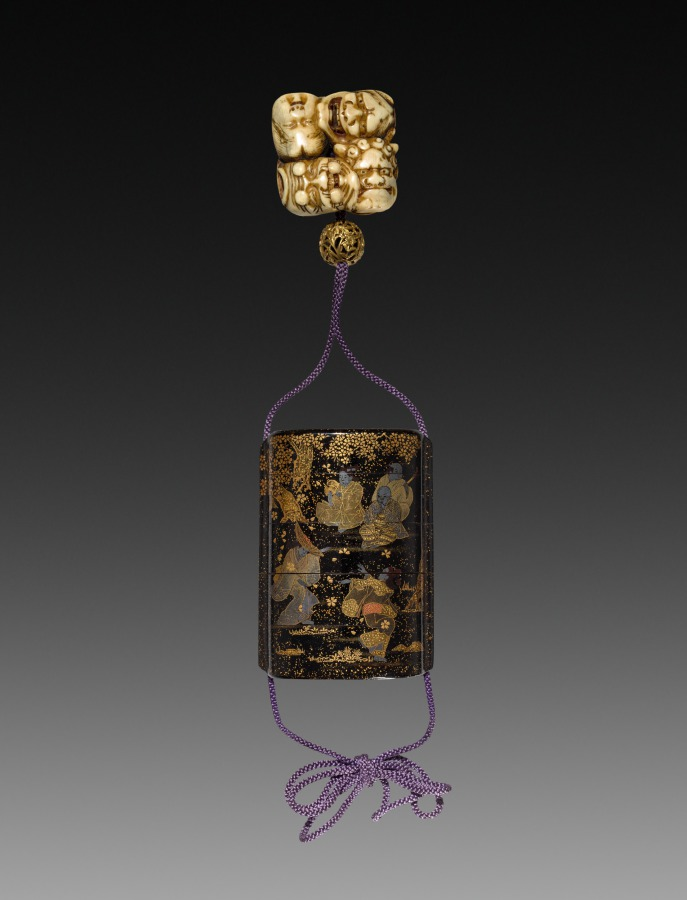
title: Inro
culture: Japan, Edo period (1615–1868)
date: early to mid-1800s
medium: lacquer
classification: Lacquer